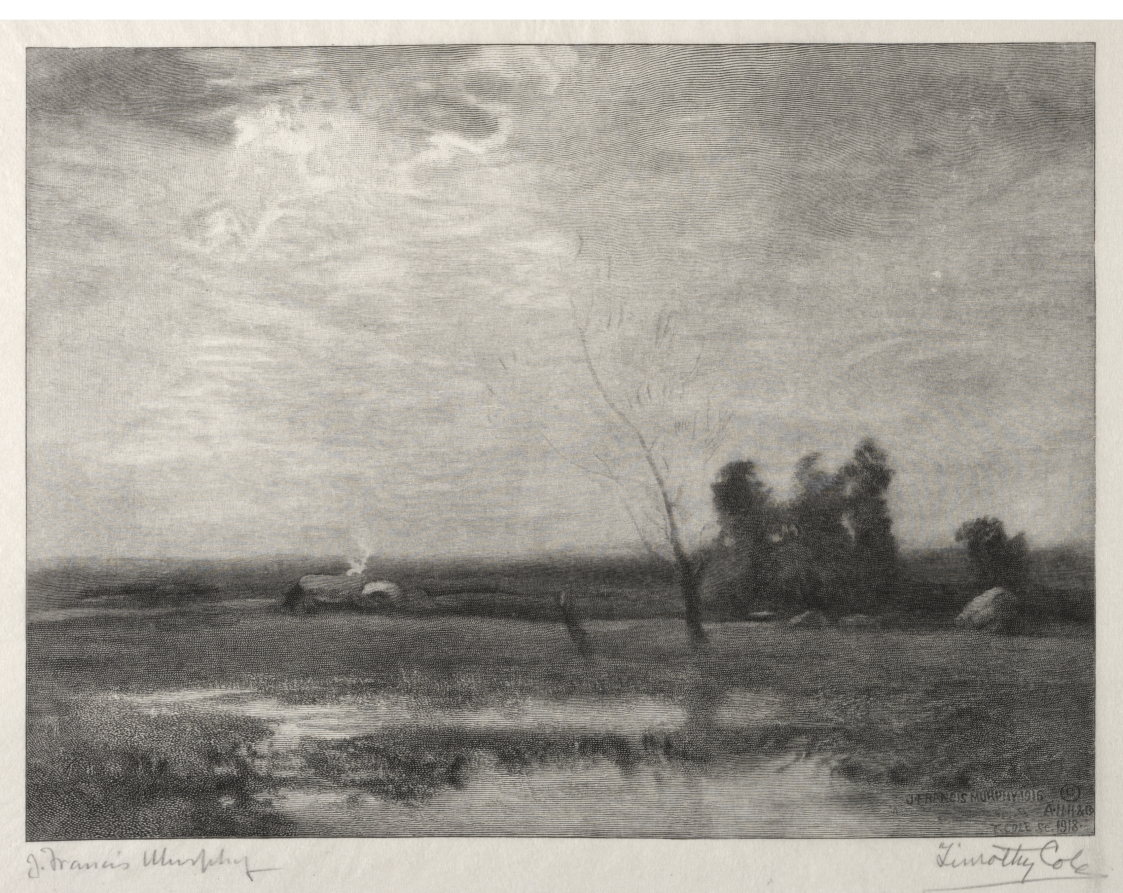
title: Lowlands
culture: America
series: 20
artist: Timothy Cole (American, 1852–1931)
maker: after John Francis Murphy (American, 1853-1921)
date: 1918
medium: wood engraving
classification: Print